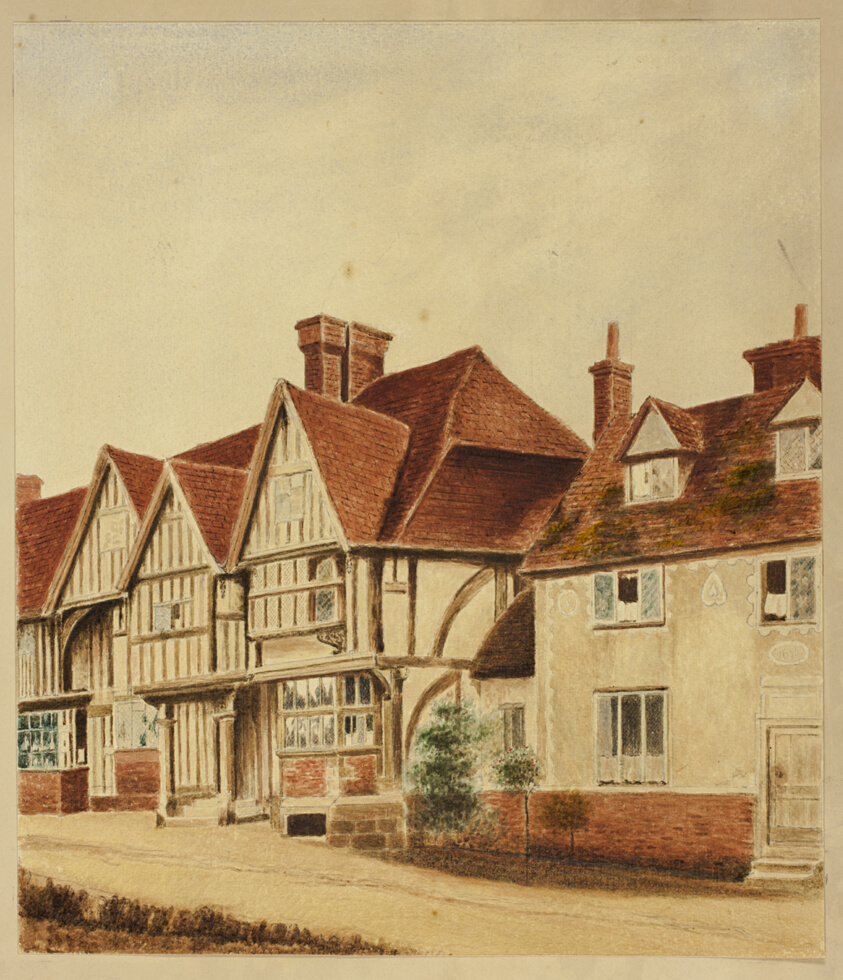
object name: Drawing and Watercolor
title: Tudor House Fronts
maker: Attributed to John Sell Cotman (British, 1782-1842); or an unknown Britsh artist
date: late 19th century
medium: Watercolor, over graphite, on cream wove paper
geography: England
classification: watercolor; drawings (visual works); prints and drawing